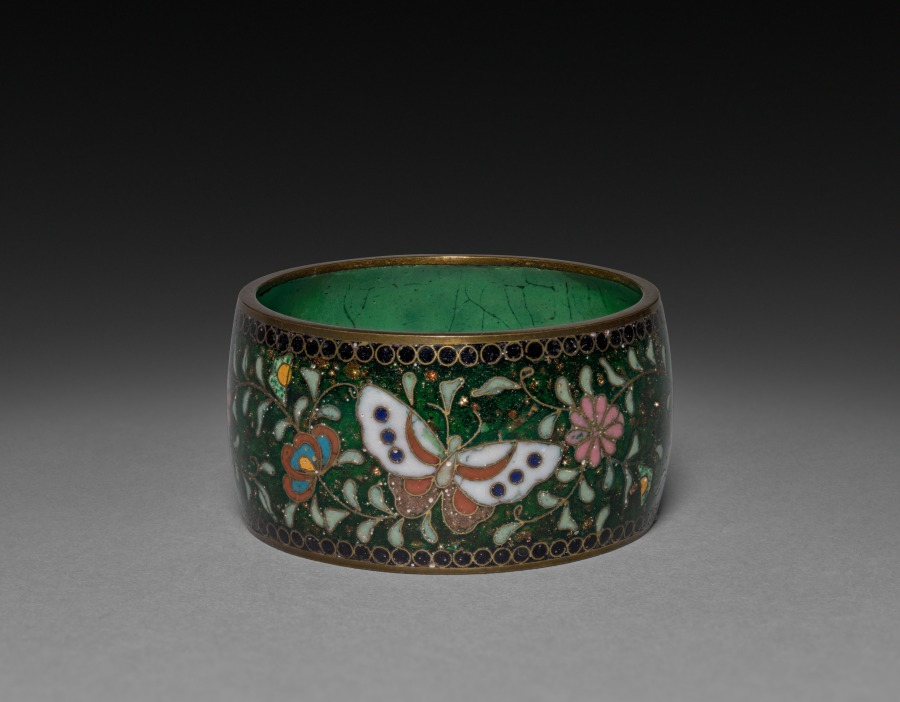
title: Napkin Ring with Butterflies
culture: Japan, Meiji period (1868–1912) or Taishō period (1912–26)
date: early 1900s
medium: cloisonne enamel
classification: Enamel